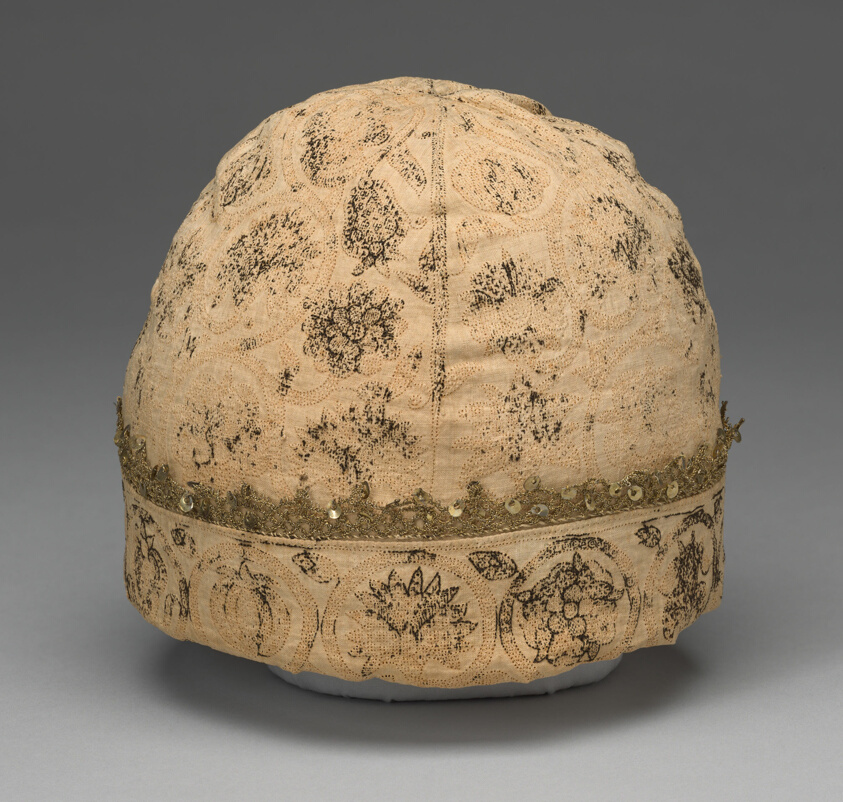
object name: Costume and Accessories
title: Cap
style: Renaissance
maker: England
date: 16th century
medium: Linen, plain weave; embroidered with silk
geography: England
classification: textile; costume accessory - headdress; needlework (visual works); costume - needlework; costume; dress (garment); clothing